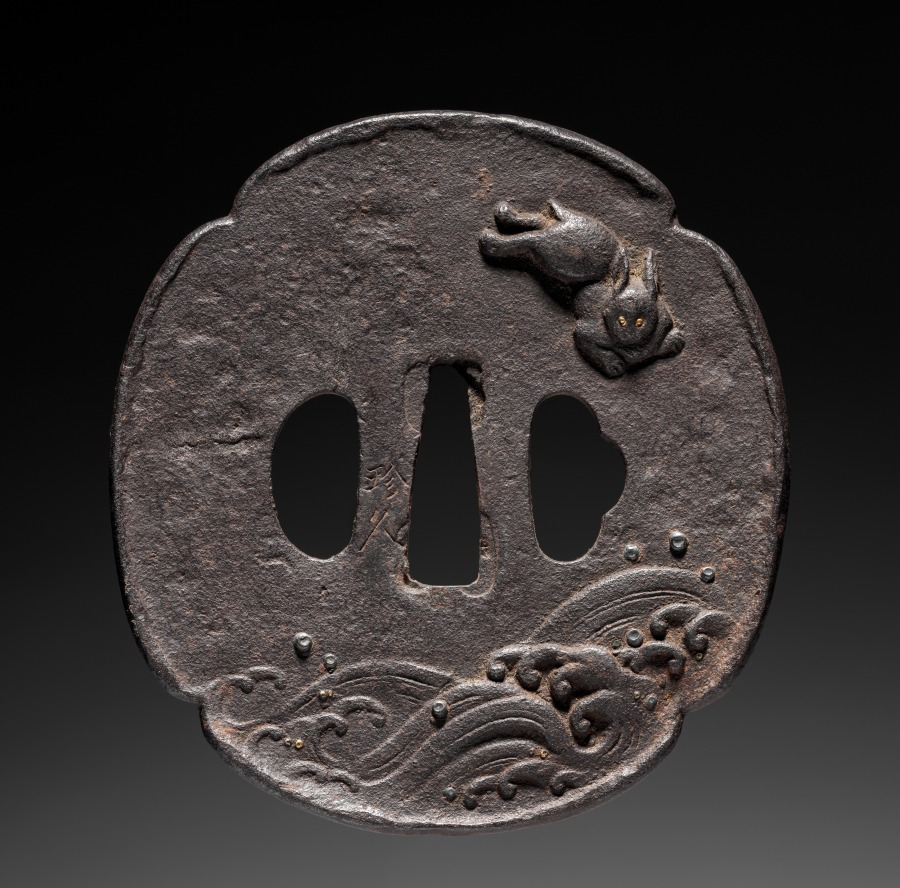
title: Sword Guard (Tsuba) with Rabbit and Waves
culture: Japan, possibly Edo period (1615-1868)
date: c. 1615–1868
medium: iron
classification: Arms and Armor